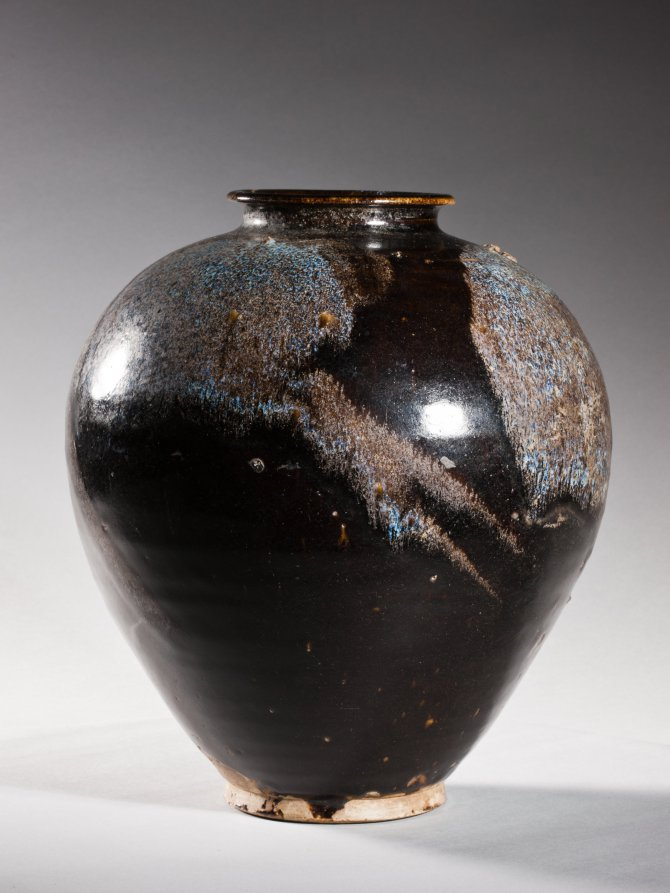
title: Jar: Black Ware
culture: China, Henan province, Huangdao kilns, Tang dynasty (618-907)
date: 700s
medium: glazed stoneware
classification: Ceramic